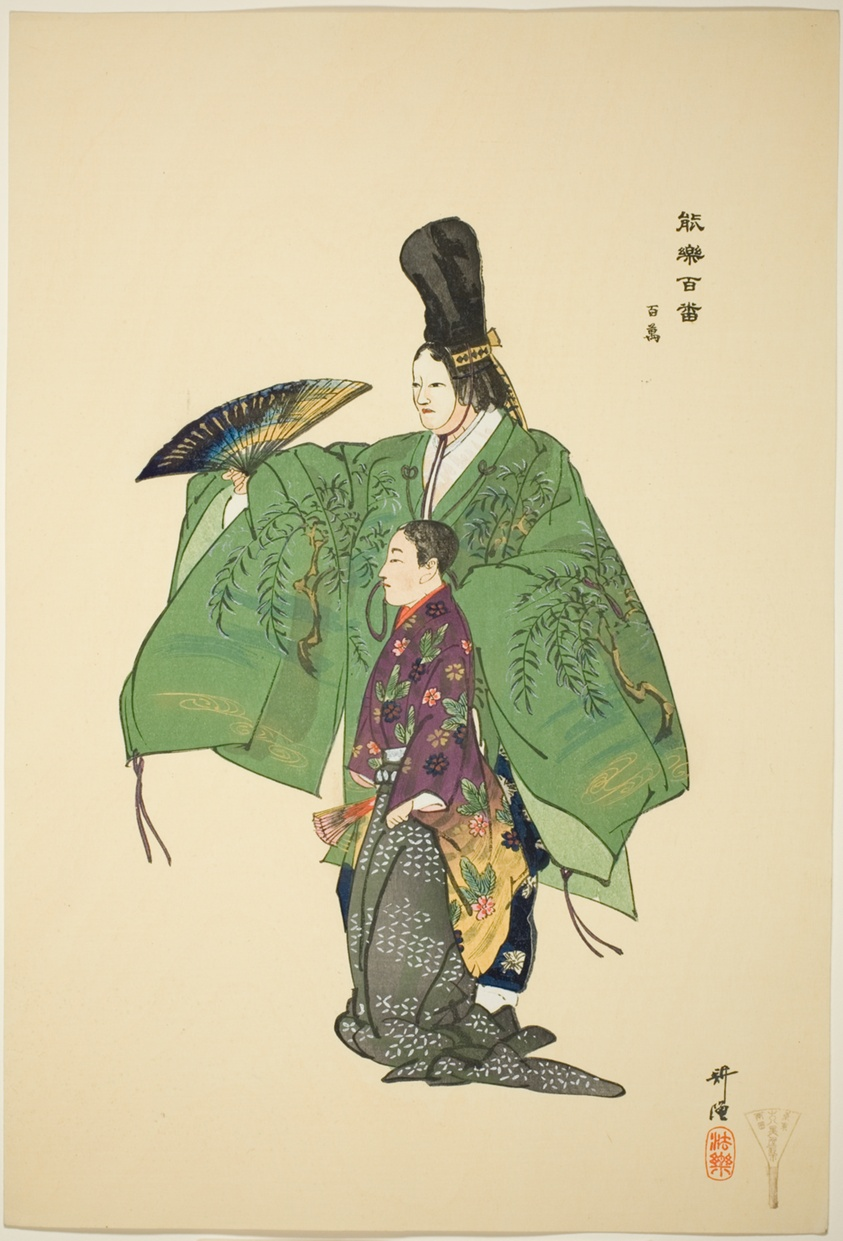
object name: Print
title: Hyakuman, from the series "One Hundred No Dramas (Nogaku hyakuban)"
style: Japanese (culture or style)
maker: Tsukioka Kogyo; Japanese, 1869-1927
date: 1898/1903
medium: Color woodblock print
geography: Japan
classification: woodblock print; print; asian art